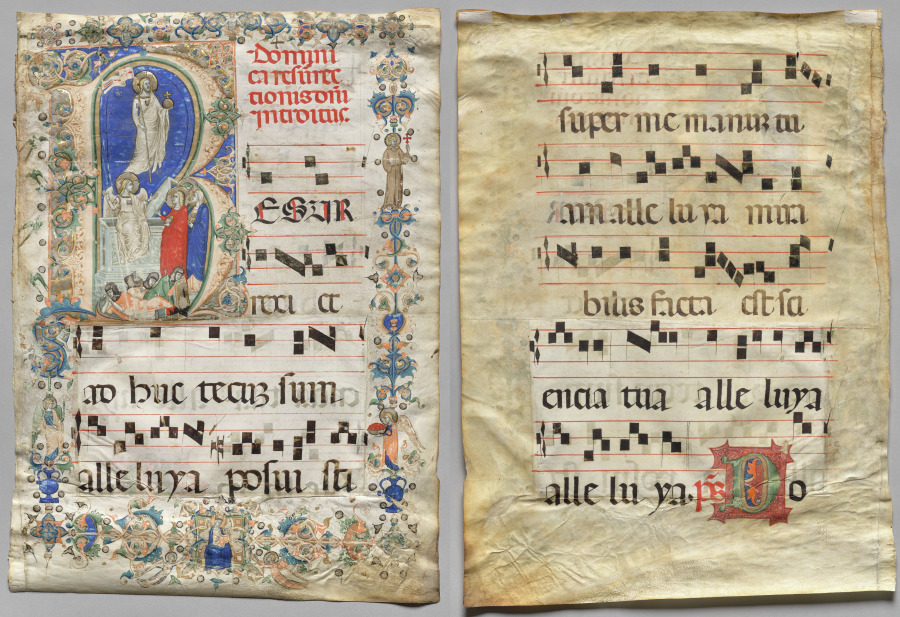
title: Leaf from a Gradual: Historiated Initial R: The Resurrection (recto) and Initial D (verso)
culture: Italy, Naples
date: mid-1300s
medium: ink, tempera, and gold on parchment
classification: Manuscript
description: This leaf was taken from a gradual, a large volume containing songs for the mass. This single leaf shows the introductory passage for Easter Sunday. The initial R is filled with the representation of the resurrection of Christ. The depiction of Saint Francis of Assisi in the floral decoration points to an origin from a Franciscan monastery. Due to the great plague, the mendicant orders to which the Franciscans belonged were the recipients of civil charitable donations. Naples, where the leaf is said to have been made, was struck by a severe earthquake around the middle of the 1300s, in addition to the plague.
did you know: The Virgin Mary is shown twice on this leaf, once at the top standing to the side of the open tomb and again in bottom border, crowned and holding the infant Christ.